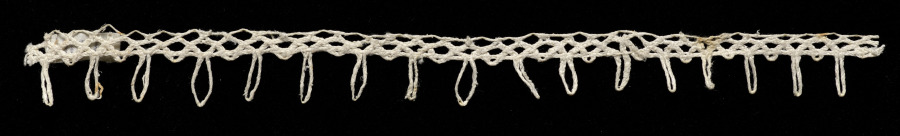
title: Lace Edging with Loops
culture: Italy, Venice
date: 1600s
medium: Bobbin lace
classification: Lace